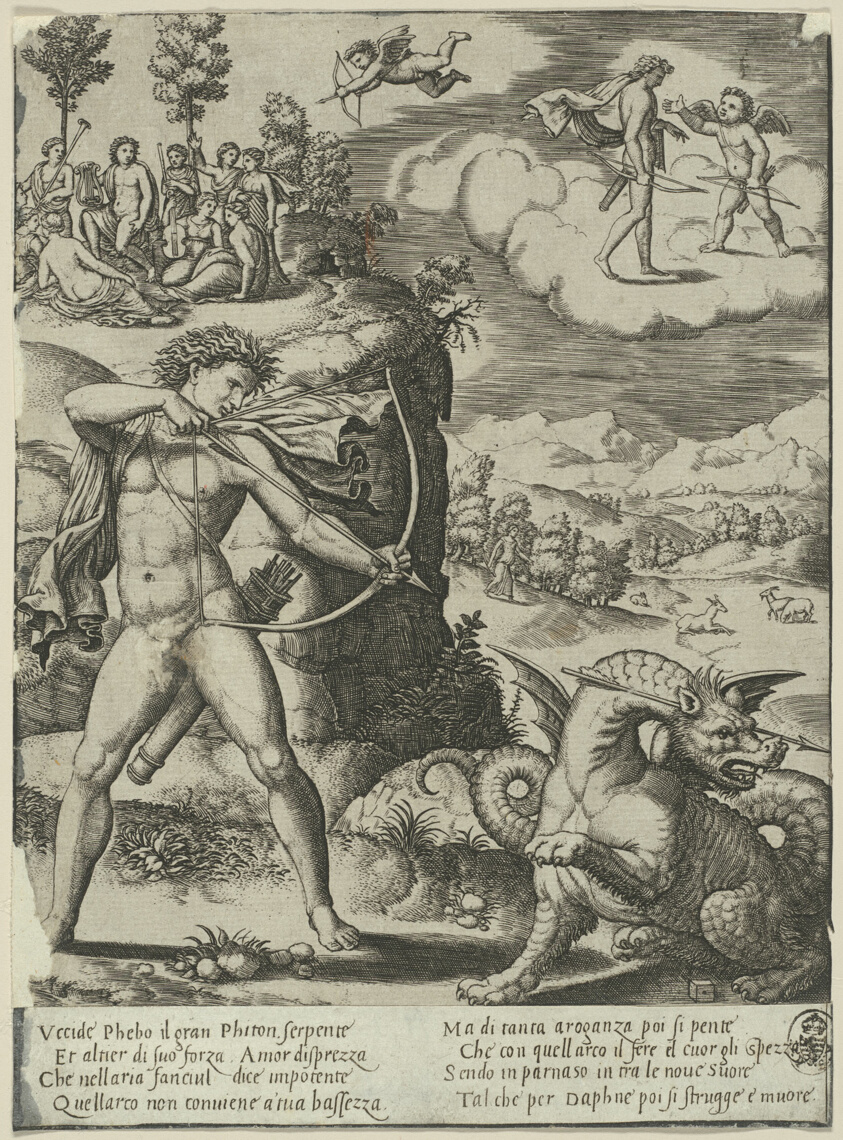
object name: Print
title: Apollo Slaying Python, plate one from The History of Apollo and Daphne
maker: Master of the Die (Italian, active c. 1530-1560); after Baldassare Peruzzi (Italian, 1481-1536)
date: c. 1532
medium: Engraving in black on ivory laid paper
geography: Italy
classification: print; prints and drawing